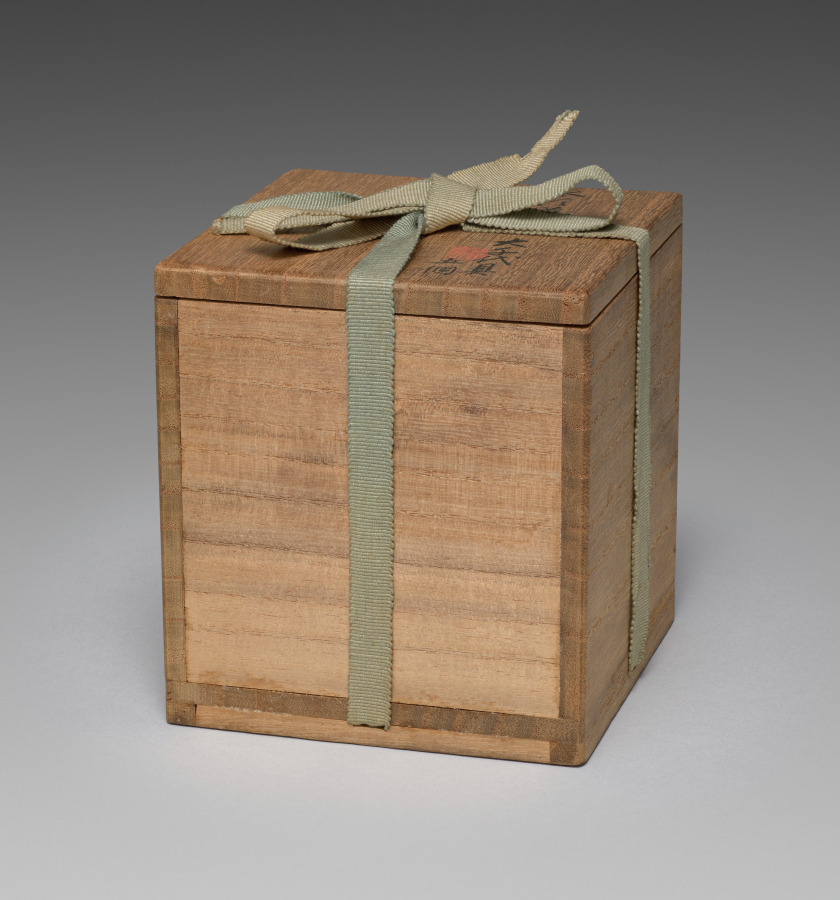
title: Dishes with Flowers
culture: Japan, Taishō period (1912–26) or Shōwa period (1926–89)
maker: Seifū Yohei IV (Japanese, 1872–1951)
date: 1914–46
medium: Set of five dishes; porcelain with underglaze yellow and blue glaze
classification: Ceramic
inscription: 清風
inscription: 清風造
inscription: 成山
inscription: 清風盧人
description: One can imagine a cool summer breeze when looking at this set of dishes, each shaped with a crenulated mouth and glazed with blue. Around the rim and into the basin, the bowls have low-relief designs of flowers with underglaze yellow petals; their leaves and stems show white through the glaze. On each dish, the design continues over the rim onto one side.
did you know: Seifū Yohei IV’s dishes with flowers feature underglaze yellow.